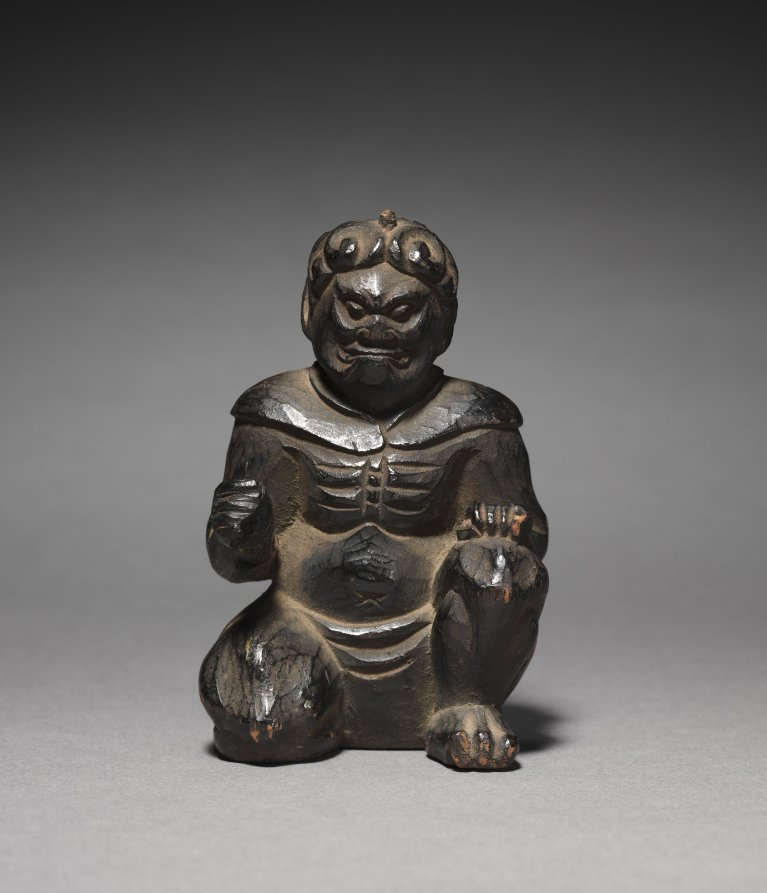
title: En no Gyōja with Zenki and Kōki (Zenki)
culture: Japan, Edo period (1615–1868)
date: 1615–1868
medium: wood and paint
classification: Sculpture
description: This is one of a trio of figures identified as Enno Gyoja and his two attendants, Zenki and Kōki. The set follows the iconography of Shugendo, the traditional mountain ascetic practice in Japan. Enno Gyoja is depicted as a hermit-monk, seated on a rock attached to a modern base. He holds a staff in his right hand and a sutra in the left. The two attendants take the form of half-human, half-demonic figures and are regarded as a married couple.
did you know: This Edo period sculpture shares the iconography and religious function with Seated Zenki and Kōki, CMA 2012.40, from the earlier Muromachi period.